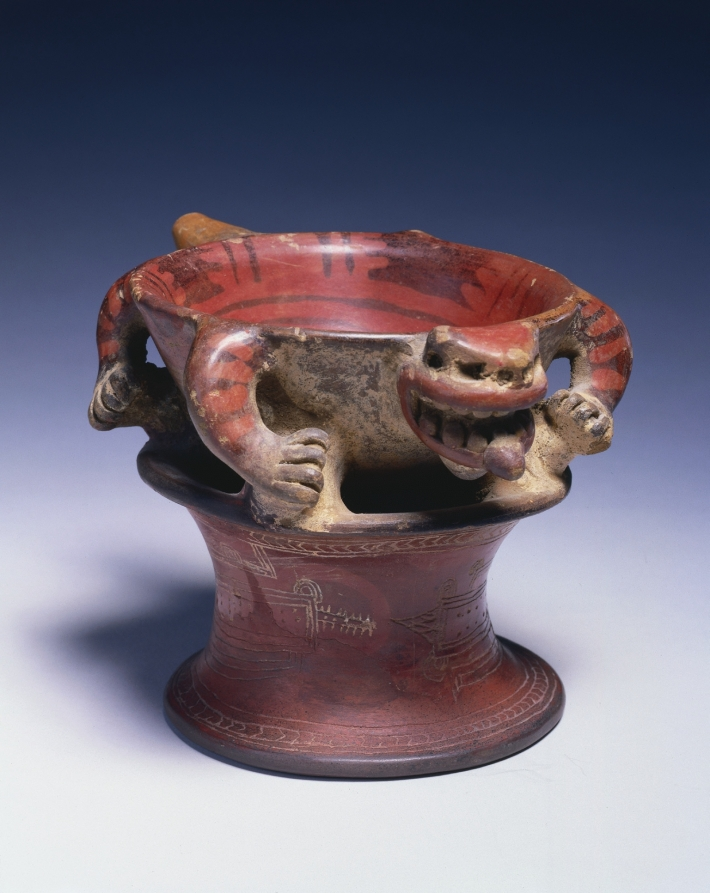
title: Jaguar Bowl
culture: Colombia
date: c. 850–1500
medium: resist-painted earthenware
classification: Ceramic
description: Probably from the southern highland region of Colombia, this unusual vessel has a bowl in the form of a comically fierce jaguar, mounted atop a pedestal base.